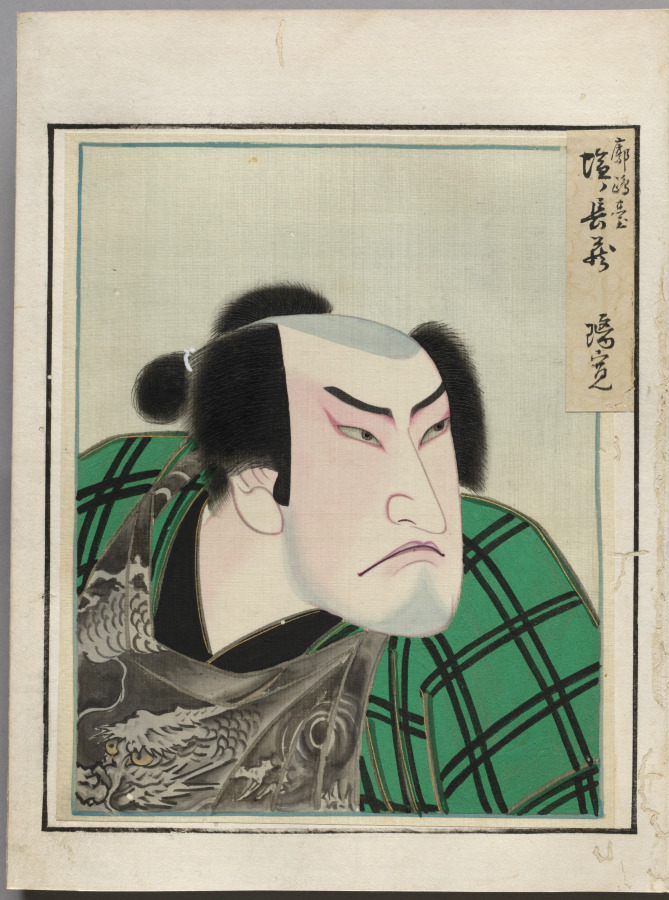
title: Double-Leaf from Album of Actor Portraits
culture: Japan, Edo period (1615–1868)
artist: Shōrakusai (Japanese)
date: c. 1790–1810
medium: double-leaf from an accordion-style album; ink on paper (right) and ink and color on silk (left)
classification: Bound Volume